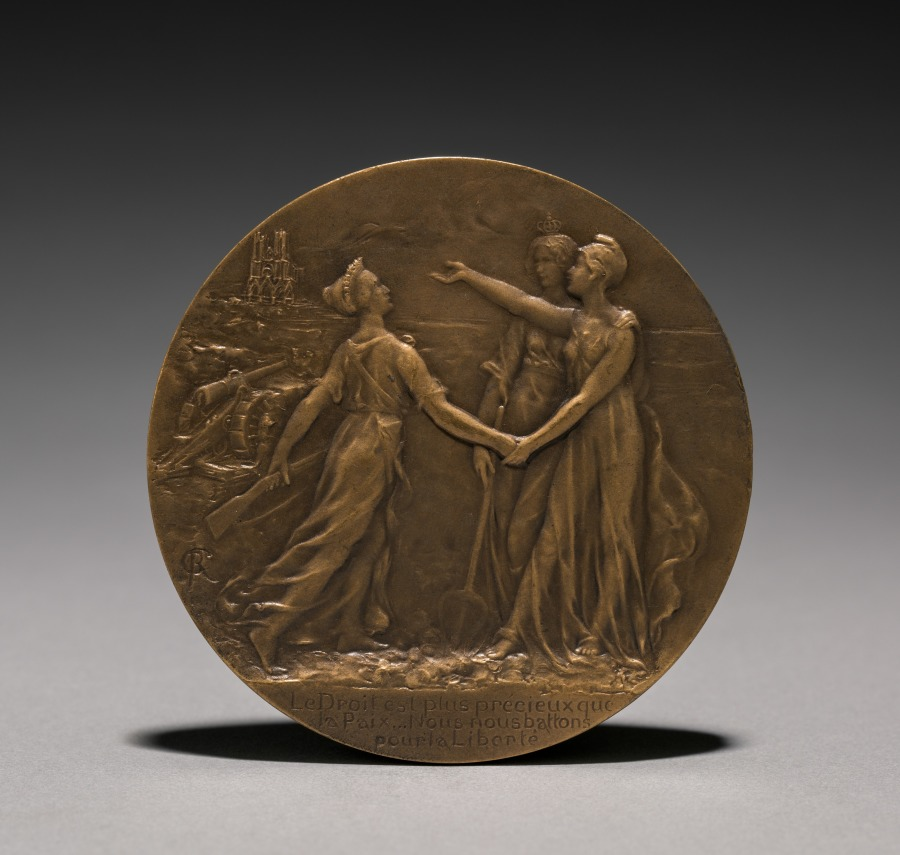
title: Medal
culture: France, early 20th century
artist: René Grégoire (French, 1871–1945)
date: 1914–1918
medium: bronze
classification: Metalwork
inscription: observse - "Wilson." reverse - "Le droit est plus précieux que la paix . . . Nous, nous battons pour la liberté."